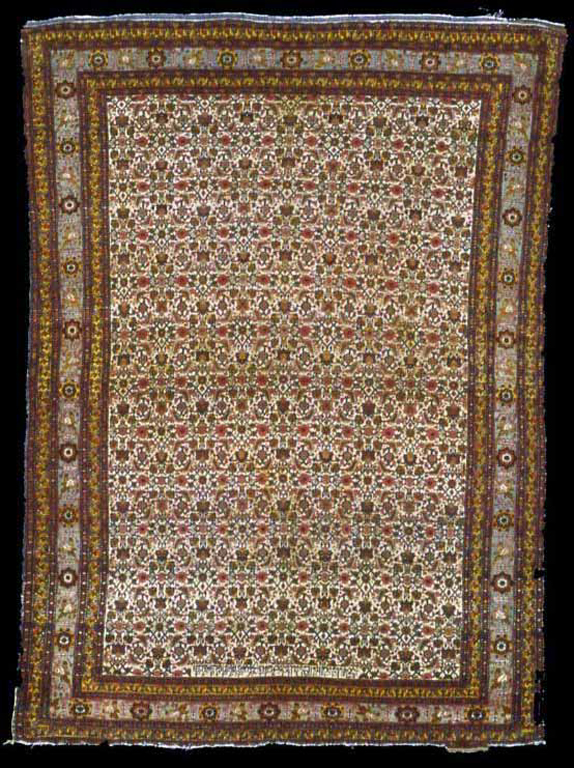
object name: Textile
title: Prayer Carpet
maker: Iran, Sehna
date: c. 1894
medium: Silk and wool, plain weave with supplementary wrapping wefts forming cut pile through a technique known as "Persian" (Sehna) knots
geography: Iran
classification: textile; weaving - carpet